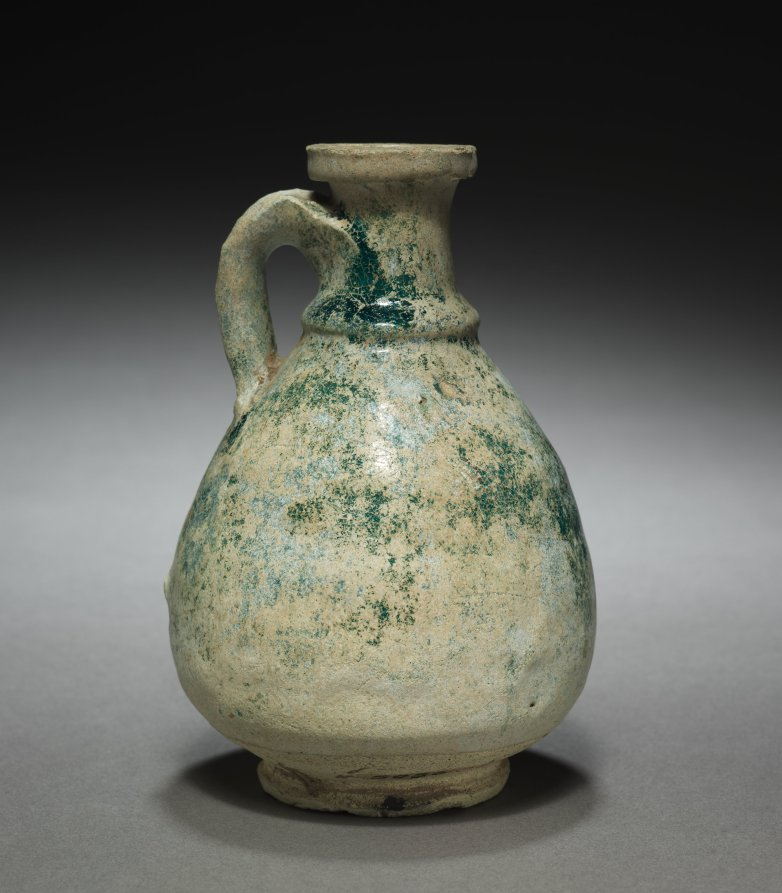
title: Jar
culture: Parthian Empire (247 BCE–224 CE)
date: 1–200 CE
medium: earthenware with weathered glaze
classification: Ceramic